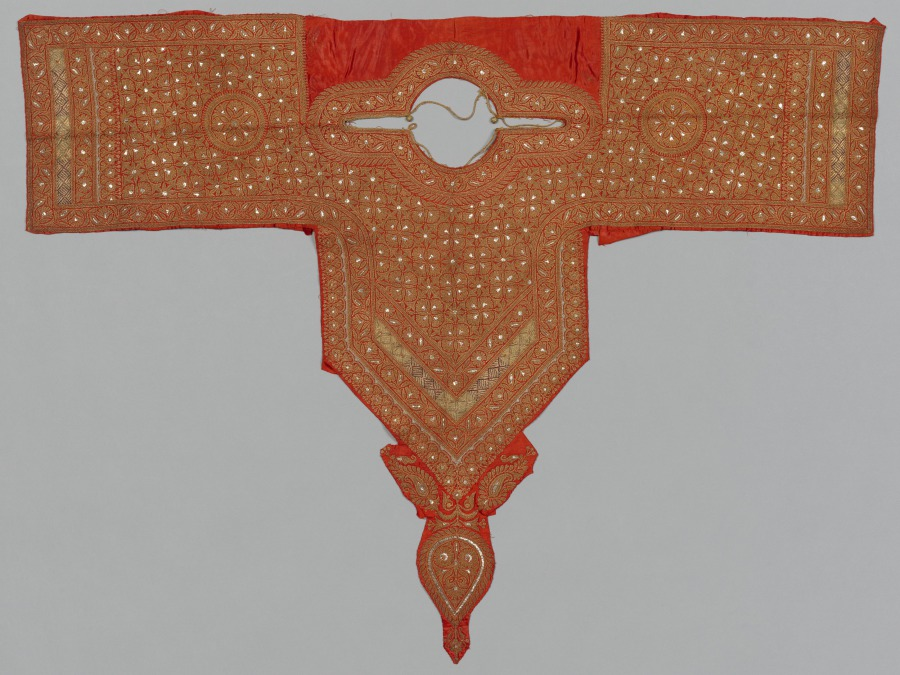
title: Part of a Woman's Dress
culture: Western India, Gujarat, Kachchh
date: 1800s–early 1900s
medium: silk and metal on silk ground, embroidery, cotton backing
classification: Embroidery